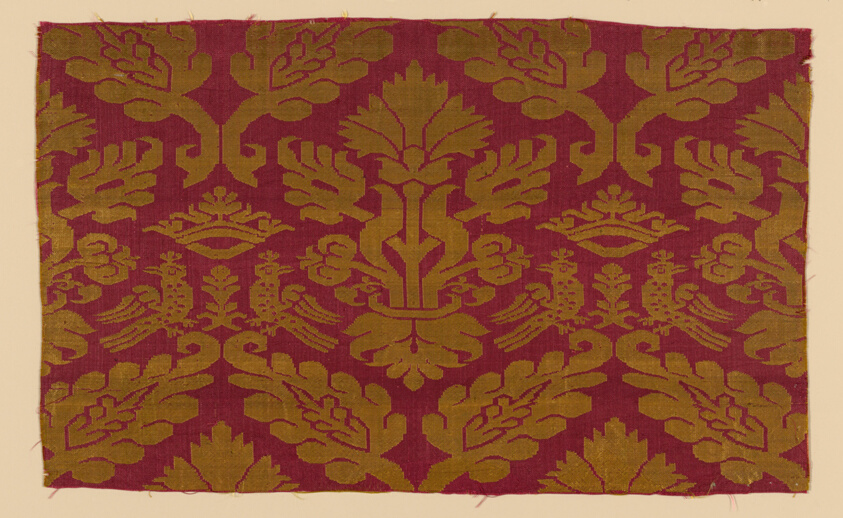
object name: Textile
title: Fragment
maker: Italy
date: 16th century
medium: Silk, plain weave with plain interlacings of secondary binding warps and supplementary patterning wefts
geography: Italy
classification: textile; weaving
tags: crowns, animals, birds, flowers, foliage